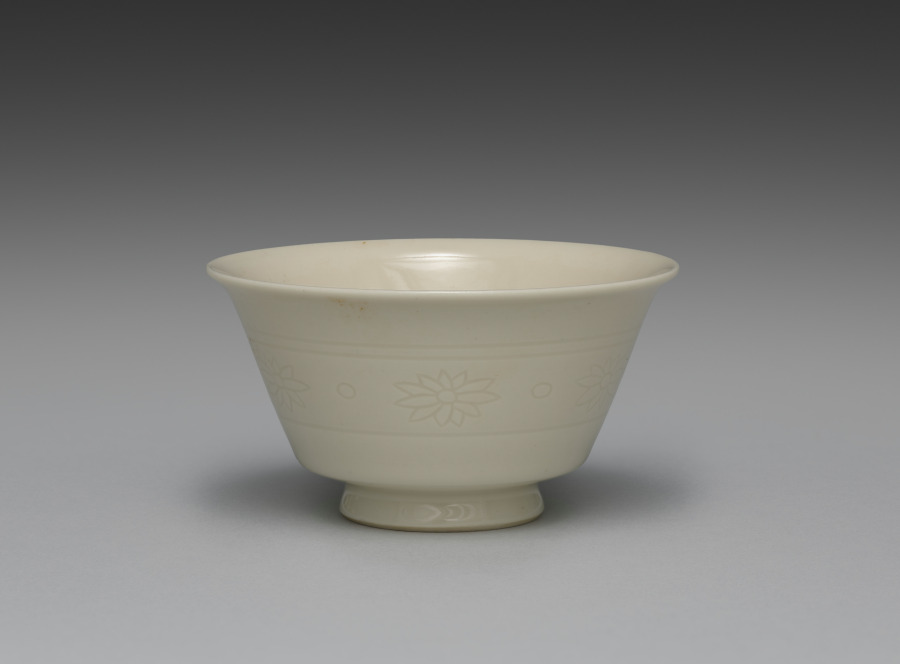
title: Teacup from Teacups with Floral Band Motif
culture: Japan, Meiji period (1868–1912)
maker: Seifū Yohei III (Japanese, 1851–1914)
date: 1893–1914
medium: One from a set of five cups; porcelain with incised decoration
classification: Ceramic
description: The five sencha teacups in this set are decorated with incised flowers and dots between a double band at the top and a single band at the bottom. They are in Yohei III’s creamy taihakuji body and glaze. In their motifs, they are quite similar to an incense burner by Yohei III (see CMA 2022.180), but the flowers are even more simple in design, with no open circle at the center. A label affixed to the side of the box refers to them as “sencha cups in emulation of Korean white [ware].” The reference to Korean ware indicates that even though Yohei was more directly inspired by Qing-dynasty wares from the Dehua kilns in Fujian Province in developing his porcelain clay and glaze for works such as these, the general understanding of the continental models still placed them, at least in terms of color, among pieces broadly associated in Japan with Korean white wares. The delicate cups are thinly potted, so they have a highly desirable translucency.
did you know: The delicate cups in this set are thinly potted, so they have a highly desirable translucency.